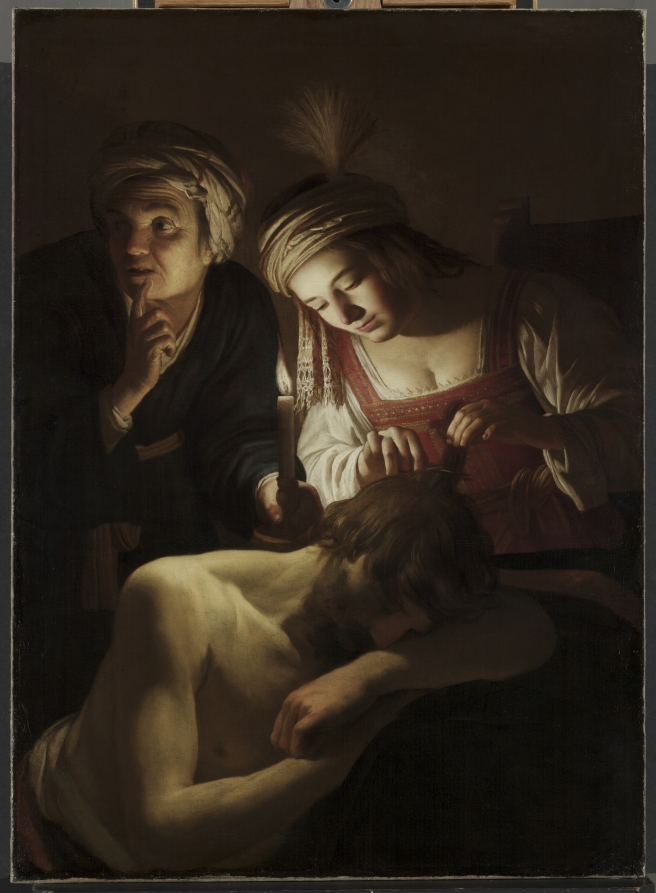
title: Samson and Delilah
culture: Netherlands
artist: Gerrit van Honthorst (Dutch, 1590–1656)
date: c. 1616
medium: oil on canvas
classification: Painting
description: In retaliation for Samson’s single-handed decimation of their army, the Philistines bribed his lover Delilah to discover the source of his strength: his hair, uncut since birth. Samson’s hair was shorn as he lay sleeping in Delilah’s lap, draining his strength and allowing the Philistines to capture him. Honthorst intensified the inherent drama of the scene by limiting his depiction to just three closely packed figures, starkly illuminated by a single candle. The old woman’s silencing gesture involves the viewer in the action, making us complicit in Delilah’s deceit.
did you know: Flickering candlelight and a nocturnal setting enhance the furtive nature of Delilah's actions.